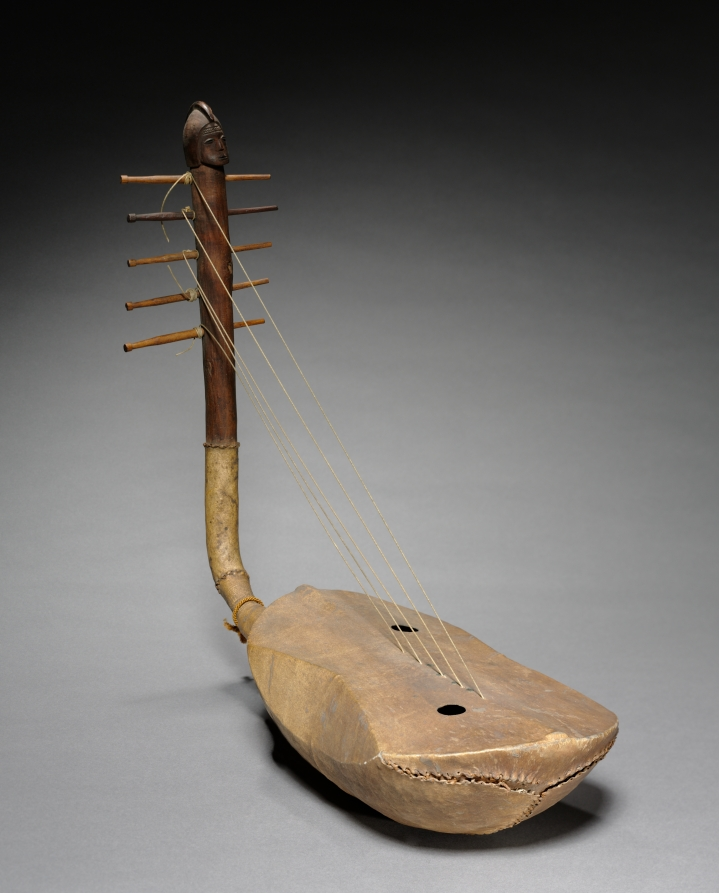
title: Figurative harp (domu)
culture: Africa, Central Africa, Democratic Republic of Congo, Mangbetu style, unknown maker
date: 1900s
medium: Wood, rawhide, and string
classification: Musical Instrument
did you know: Musical instruments like this domu (figurative harp) were among the many decorated utilitarian Mangbetu rulers collected.